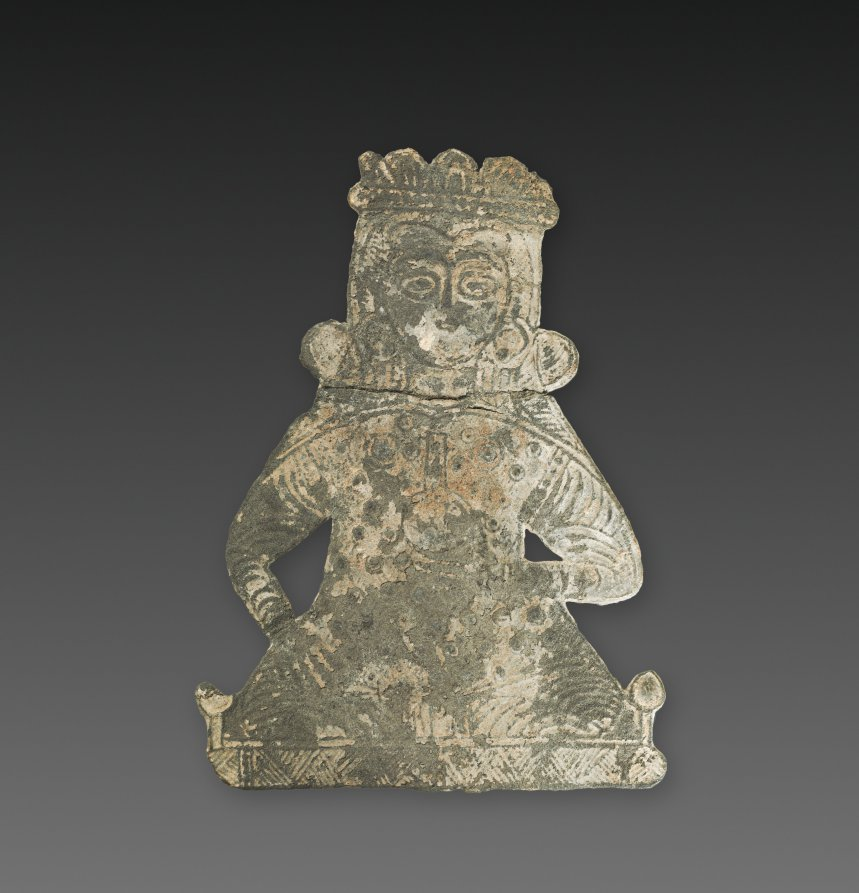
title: Seated Figure holding a Vase or Flask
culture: Iran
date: before 1984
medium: lead relief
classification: Sculpture